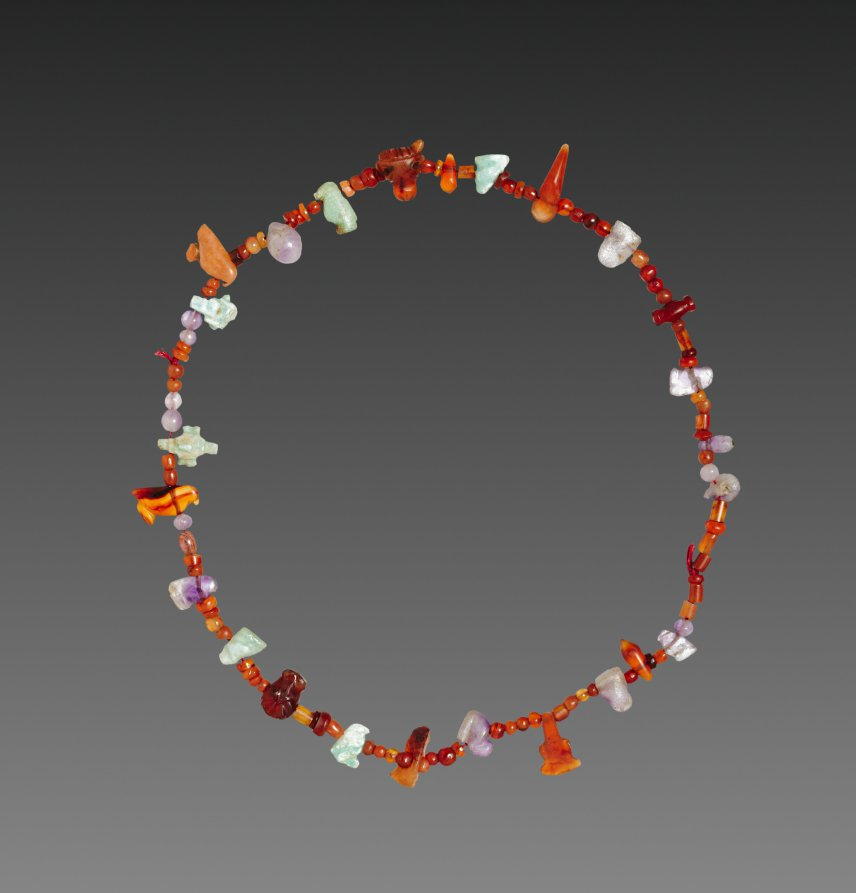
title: Necklace of Amulets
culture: Egypt, Middle Kingdom (2040–1648 BCE), Dynasty 12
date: 1980–1801 BCE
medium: carnelian, feldspar, and amethyst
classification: Jewelry